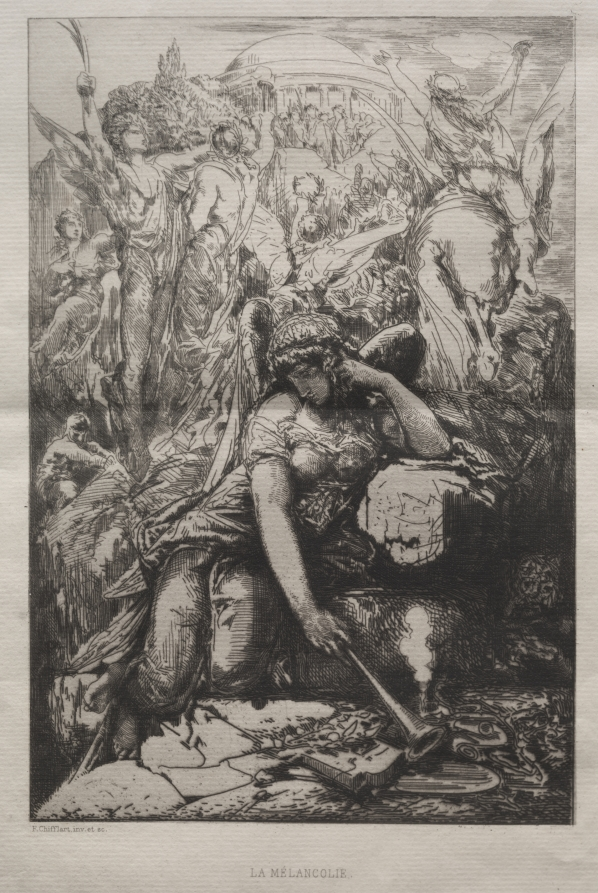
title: Melancholy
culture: France, 19th century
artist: Nicolas-François Chifflart (French, 1825–1901)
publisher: Francois Liénard, Paris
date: 1877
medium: etching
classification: Print